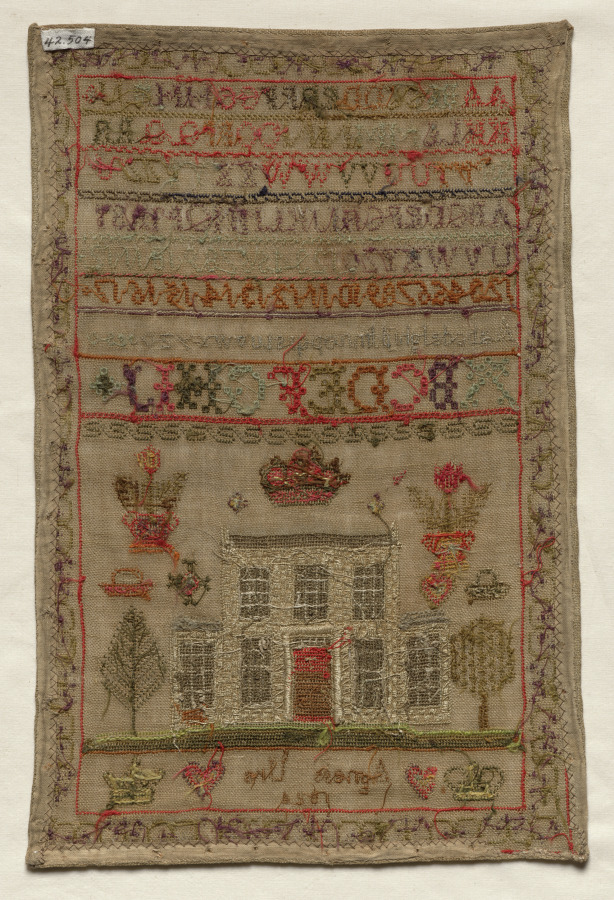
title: Sampler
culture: England, early 19th century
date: 1824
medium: embroidery; silk and wool on linen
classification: Sampler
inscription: above: "AABBCCDDEEFFGGHHIIJJ/ KKLLMMNNOOPPQQRR/ SSTTUUVVWWXXYYZZ/ ABCDEFGHIJKLMNOPQRST/ UVWXYZ/123456789.101112.13.14.15.16.17*/ Aabcdefghijklmnopqrstuvwxyz/ ABCDEFGHIJ"; below: "Agness Ure/ 1824."